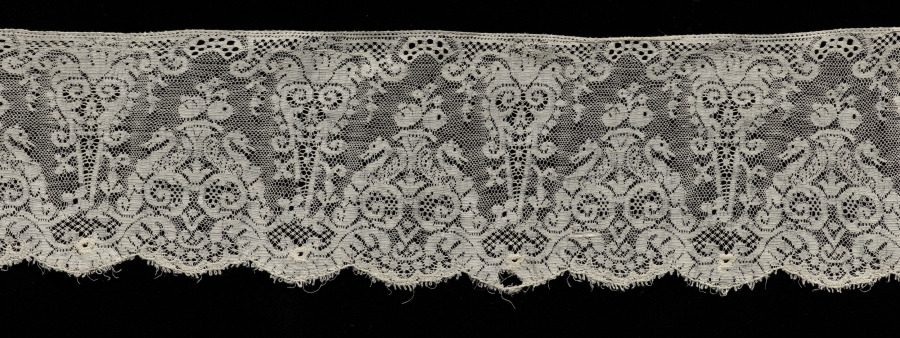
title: Lace Edging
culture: England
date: 1800–1840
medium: Machine-made lace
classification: Lace